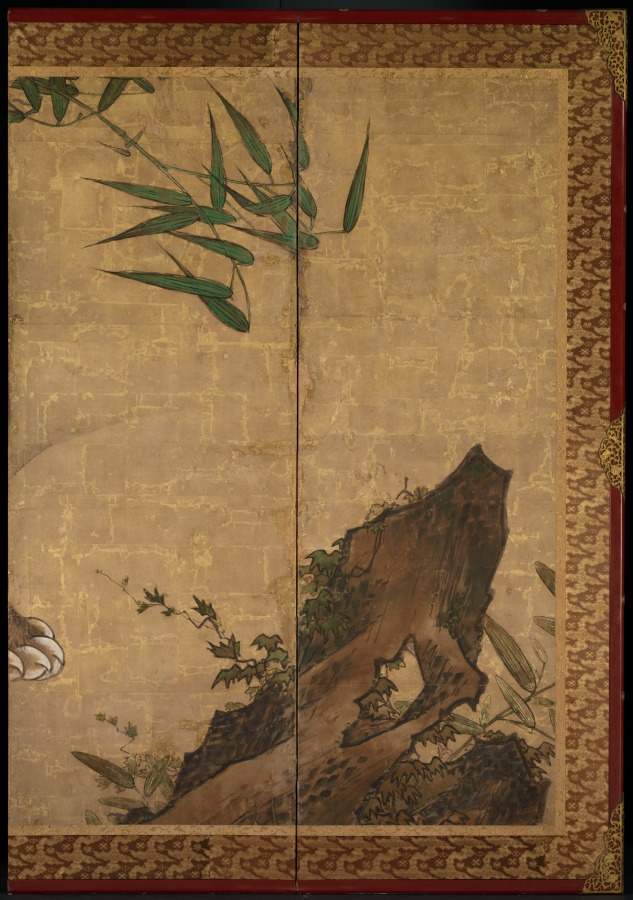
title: Lions and Tigers in Peony and Bamboo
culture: Japan, Edo period (1615–1868)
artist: Yamaguchi Sekkei (Japanese, 1644–1732)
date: 1668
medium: One of a pair of six-panel folding screens; ink and color on gilded paper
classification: Painting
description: Sekkei lived and studied painting in Kyoto at the Kano school studio, the center of traditional painting activity in Japan since 1500. The use of gold foil as a backdrop for the frolicking animals served a practical as well as a decorative function. Because traditional Japanese rooms had no windows, interior lighting came from portable oil lamps and wax candles, whose effects were magnified by reflective surfaces.